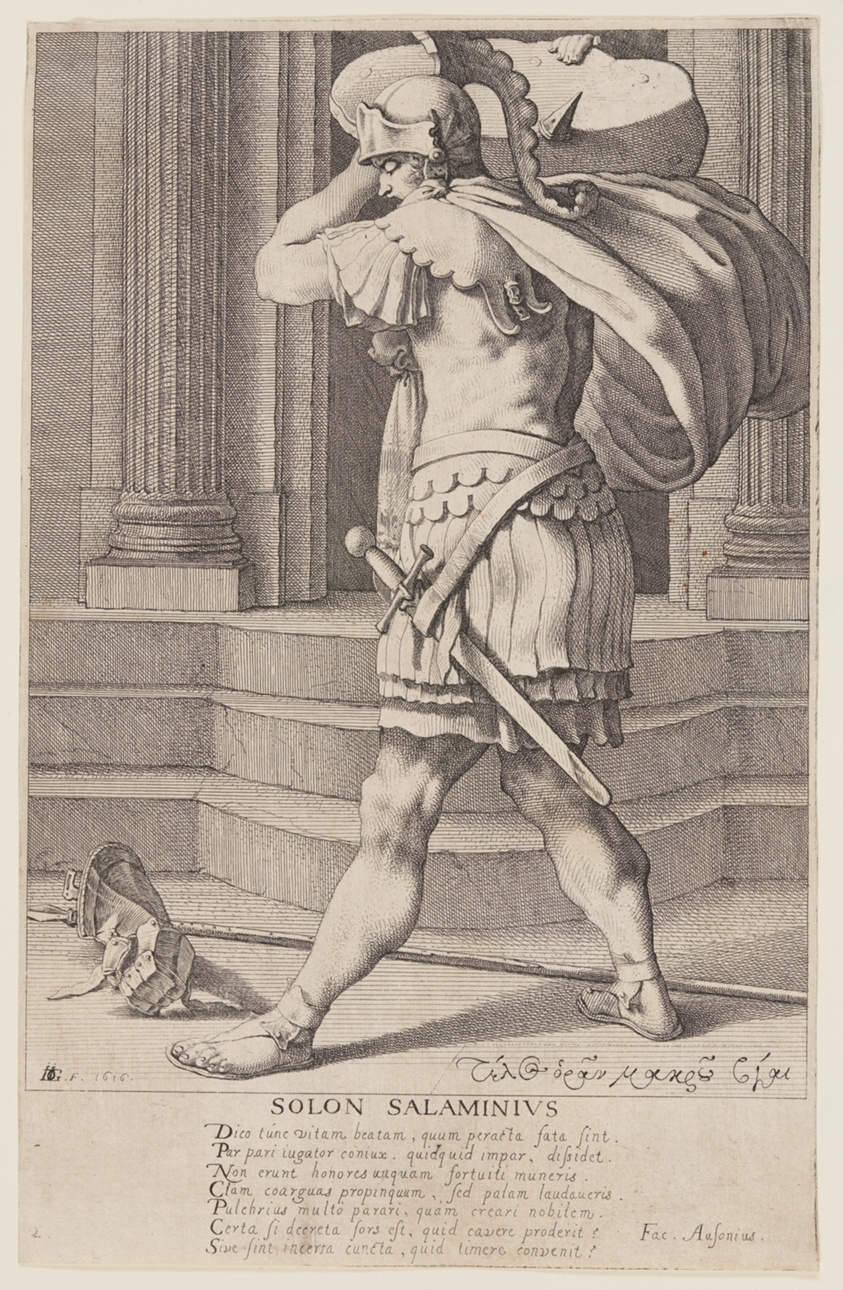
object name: Print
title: Solon Salaminius, from Seven Wise Men of Greece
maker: Jacques de Gheyn III; Dutch, c. 1596-1641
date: 1616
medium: Etching on ivory laid paper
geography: Netherlands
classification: etching; paper; print; prints and drawing